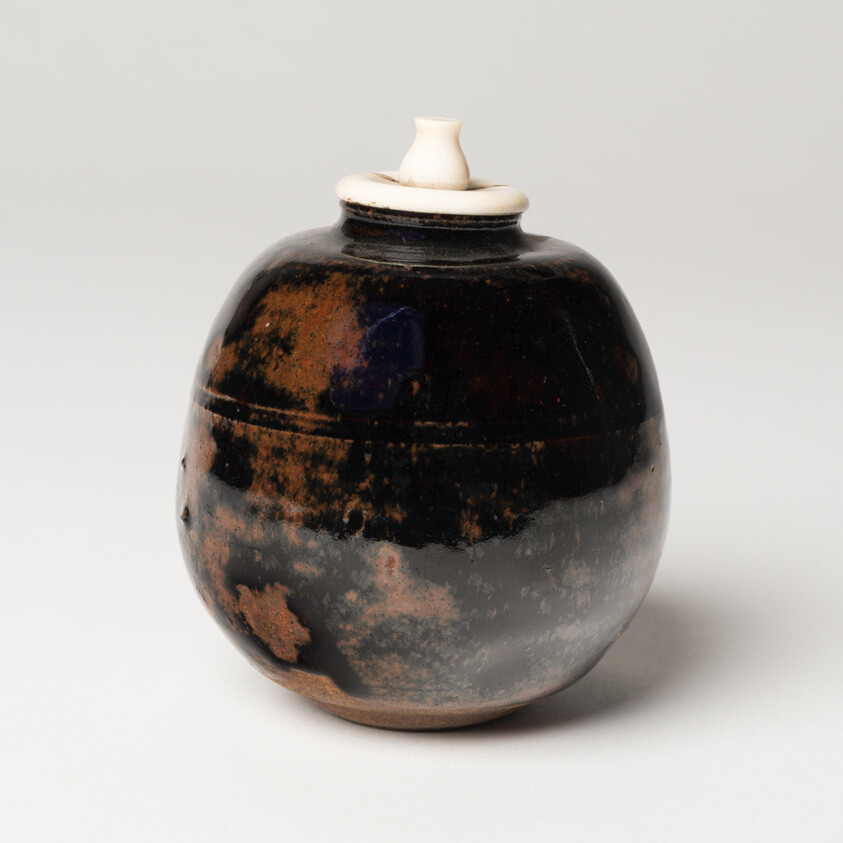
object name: Vessel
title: Tea Caddy (Cha-ire)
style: Japanese (culture or style)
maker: Japan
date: 19th century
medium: Glazed stoneware; ivory lid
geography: Ise-wan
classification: porcelain; asian art; ceramics; vessel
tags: tea